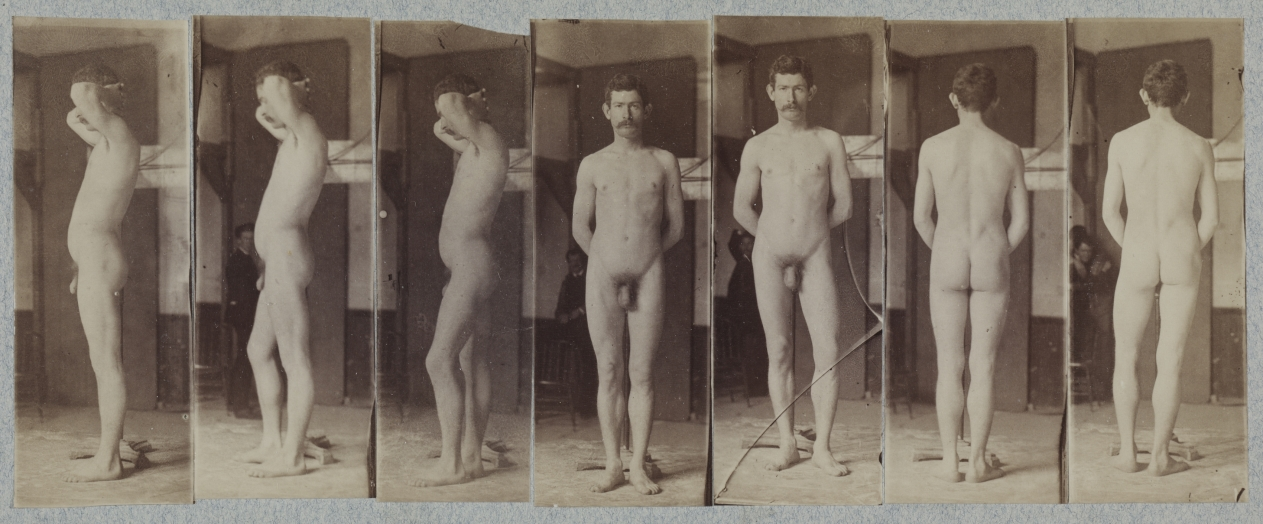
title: Photographs of a Standing Male Nude Model ("Joseph Smith")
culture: America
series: Naked Series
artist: circle of Thomas Eakins (American, 1844–1916)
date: c. 1883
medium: albumen prints from glass negatives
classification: Photograph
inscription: Written in pencil on recto of mount: "L/2040"; on verso: "0-40-3310"; "X-36"; in black ink: "Eakins/Olympia Galleries, Ltd. / Philadelphia. Cat #03310-40"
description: Eakins’s earliest use of photography was as a visual aid to painting. In the early 1880s, he began photographic experiments that would allow him to create a more accurate and convincing rendering of anatomy and the human form in motion. Recognizing the assistance these visual reminders could provide the artist, Eakins and his circle began photographing a series of nude forms modeled by men, women, and children. These images, which he called the Naked Series, consist of seven contact-printed photographs mounted on cardboard strips. They show the models from the front, side, and rear posed in contrapposto positions or with their weight equally distributed. Eakins’s other photographic endeavors included a series on the figure in motion—photographs that were clearly used as studies for paintings—and more traditional portraits and figural groupings.